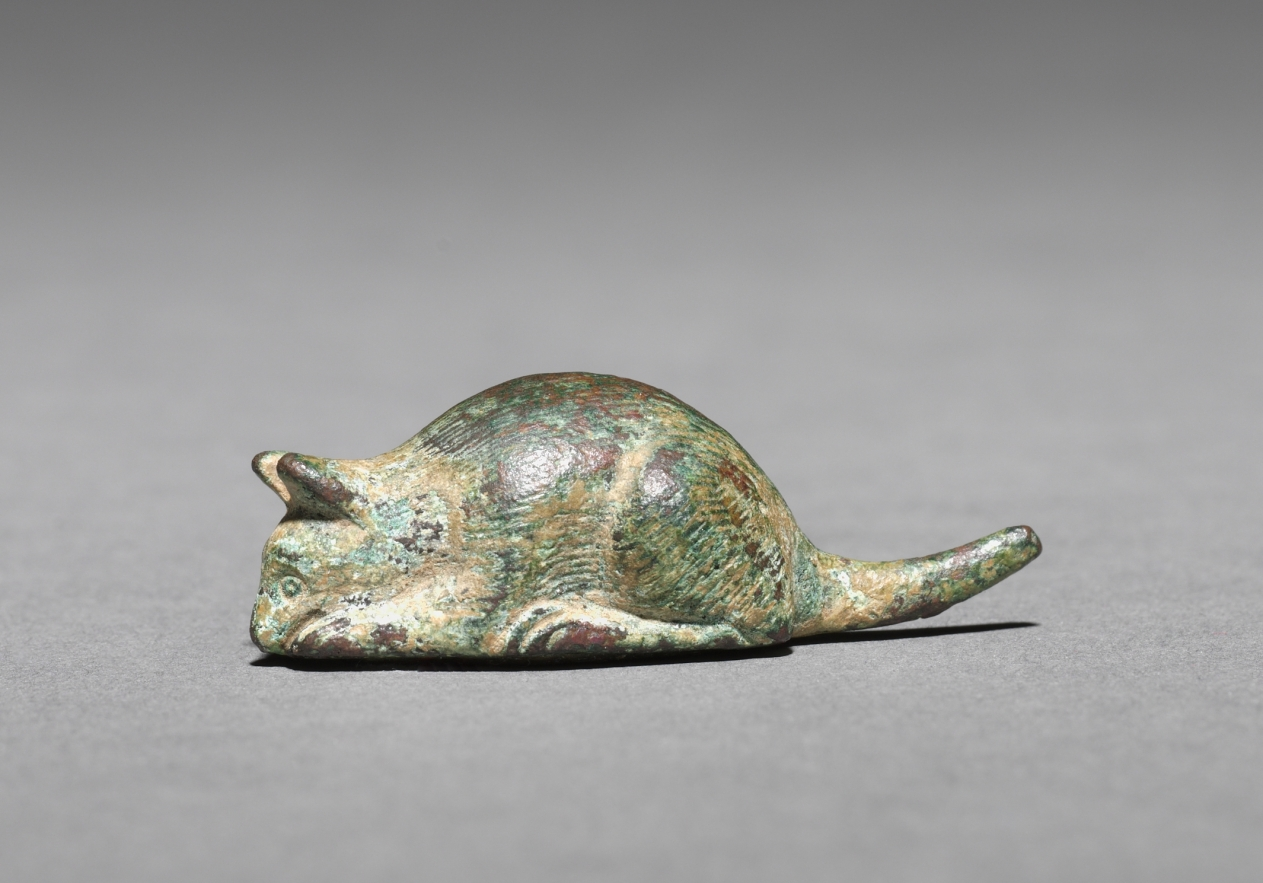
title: Mouse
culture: Italy, Rome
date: 1–200 CE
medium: bronze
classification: Sculpture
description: The Romans were the first people in antiquity to make large numbers of genre sculptures for no purpose other than household decoration. This mouse may have been just such a knick-knack or it may have ornamented a metal food container laying claim to its contents so that other mice would stay away.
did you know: Small mouse figurines were often affixed to oil lamps to ward off living mice that might eat the wicks or lamp oil